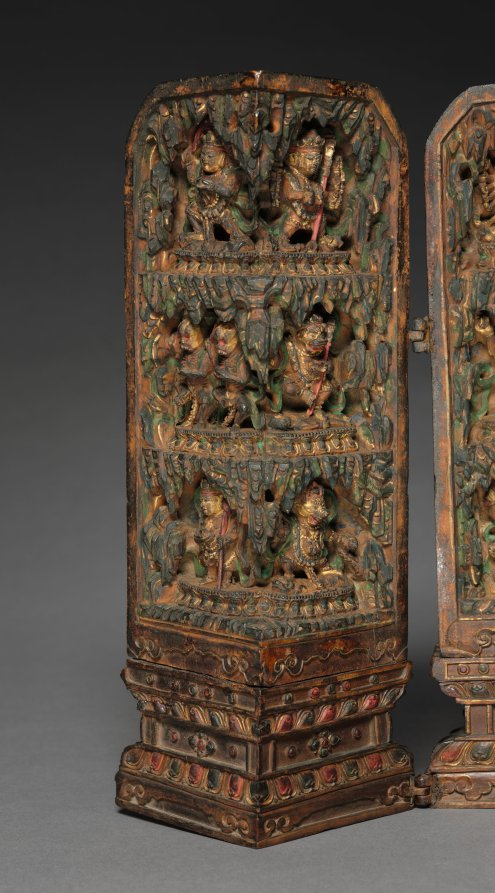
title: Portable Shrine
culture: Tibet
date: c. 1500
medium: wood with mineral pigments and metal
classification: Sculpture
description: Carved from a solid section of a log, the shrine contains images of protectors of tantric Buddhism—a branch that developed in northern India and became prominent in the Himalayas by the 700s. The central figure in the top row is Padmasambhava (Indian, active in Tibet in the 740s), venerated as the founder of one of the four main Tibetan monastic orders. Incised on the exterior are images of protectors, mantras written in Tibetan script, and a sacred funerary monument called a stupa. Tantric practice emphasizes recitation of mantras that invoke the powers of compassion, wisdom, and protection.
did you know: Tantric practice can be performed alone in any location; this shrine could be used by a traveling practitioner for meditation, visualization, prayer, and recitation of mantras.